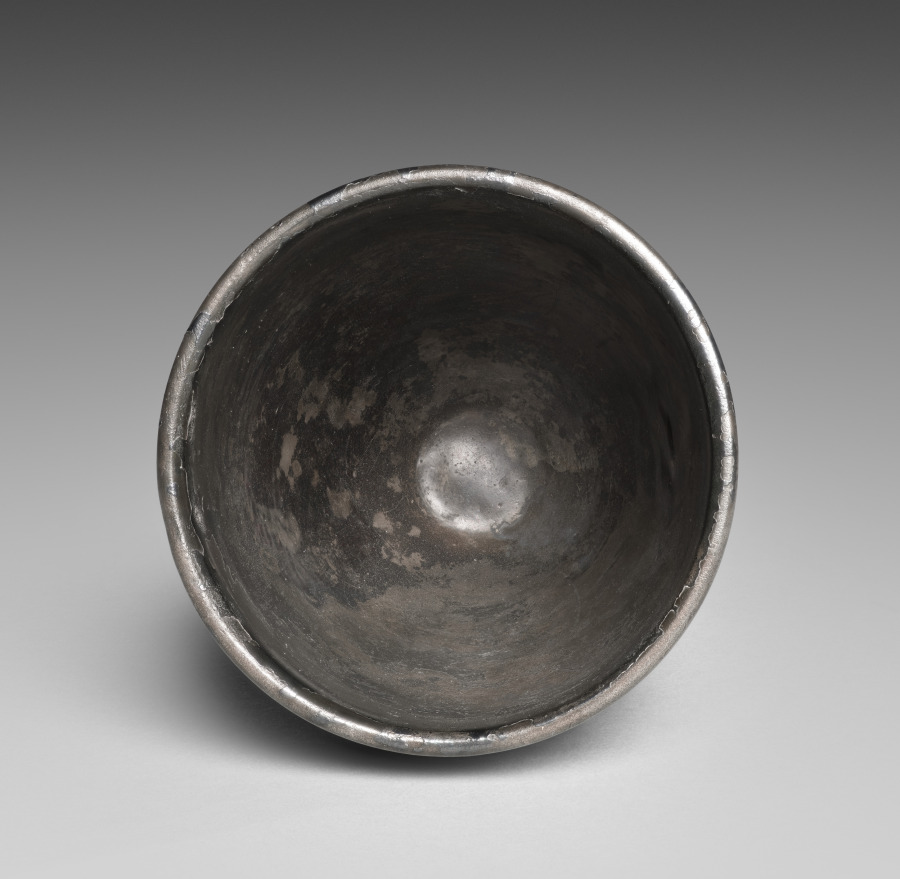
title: The Vicarello Goblet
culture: Italy, Vicarello (ancient Aquae Apollinares), Roman, Augustan period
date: 25 BCE–25 CE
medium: silver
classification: Metalwork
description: This masterpiece of the Roman silversmith’s art is exquisitely worked in relief. The multifigure scene centers on a rustic shrine of the ithyphallic fertility god Priapus, son of Dionysos. He takes the form of a stylized boundary marker atop a column, where a woman seems to have brought him to life by touching him. To the left sits a table with votive offerings to the god. Flanking the shrine are a satyr and maenad, dancing ecstatically.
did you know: This silver cup was found north of Rome at Vicarello (ancient Aquae Apollinares), probably in 1862.